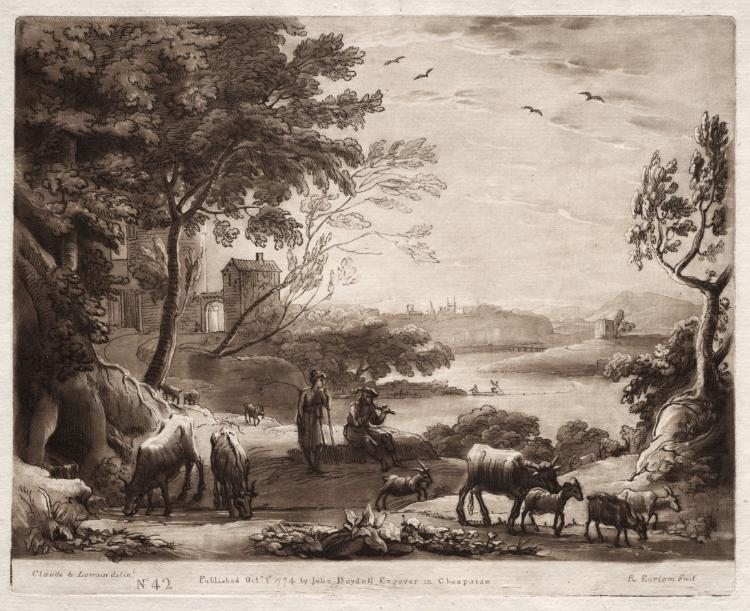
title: Liber Veritatis: No. 42, A River Landscape with a Shepherd and Shepherdess and a Herd of Cattle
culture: England, 18th century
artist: Richard Earlom (British, 1743–1822)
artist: after Claude Lorrain (French, 1604–1682)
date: 1774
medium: etching and mezzotint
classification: Print